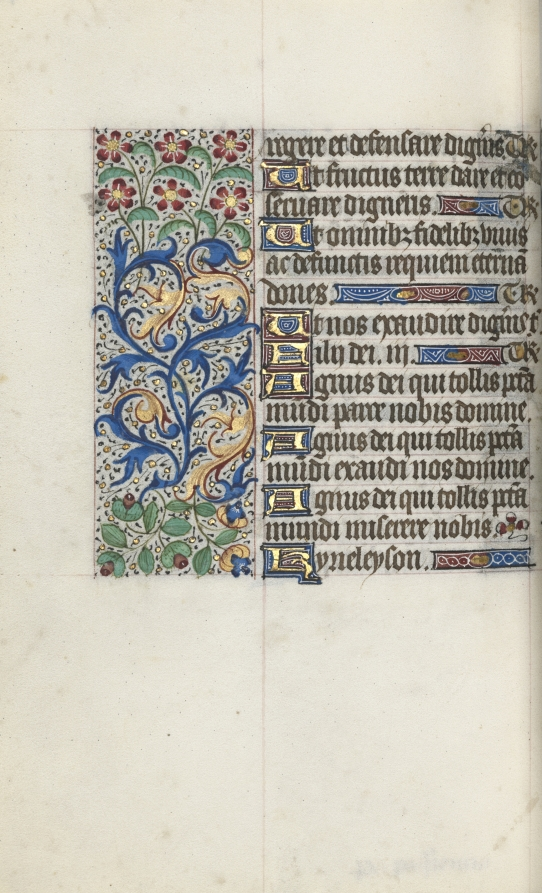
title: Book of Hours (Use of Rouen): fol. 95v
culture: France, Rouen, 15th century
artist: Master of the Geneva Latini (French, active Rouen, 1460–80)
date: c. 1470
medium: ink, tempera, and gold on vellum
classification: Bound Volume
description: In the late 1400s and early 1500s Rouen was an established and important center of book production. The city’s cathedral had a wealthy chapter that spent large sums of money to commission books and to maintain its extensive library. The stationers and booksellers would have likely been concentrated in or near the cathedral precinct. This artist, named after a manuscript now in Geneva, was Rouen’s principal illuminator during the second half of the 1400s.